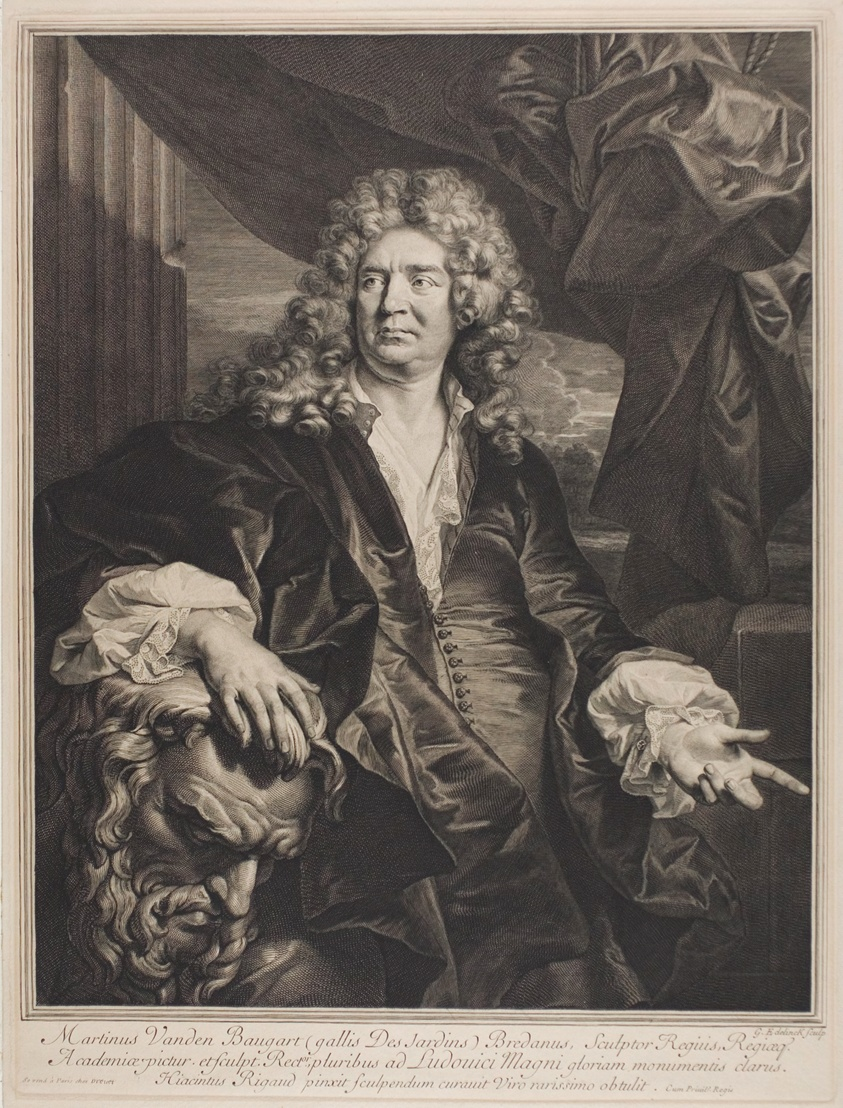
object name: Print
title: Martin Vanden Bogaert Desjardins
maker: Gérard Edelinck (French, born Flanders, 1640-1707); after Hyacinthe Rigaud (French, 1659-1743)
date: 1698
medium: Engraving on paper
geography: France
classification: engraving; print; prints and drawing